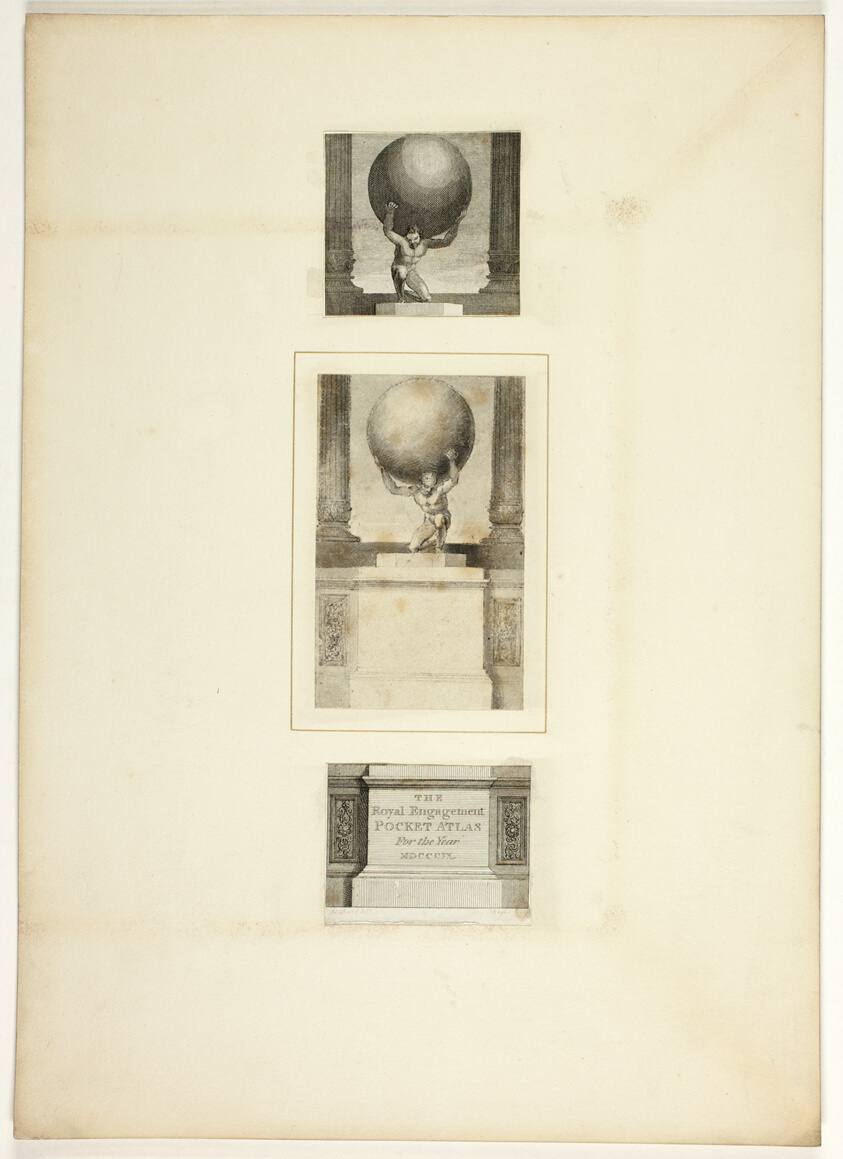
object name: Print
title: Study for frontispiece from Marmion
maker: Thomas Stothard (English, 1755-1834)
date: c. 1808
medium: Ink Wash on paper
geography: England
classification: ink and wash; print; prints and drawing